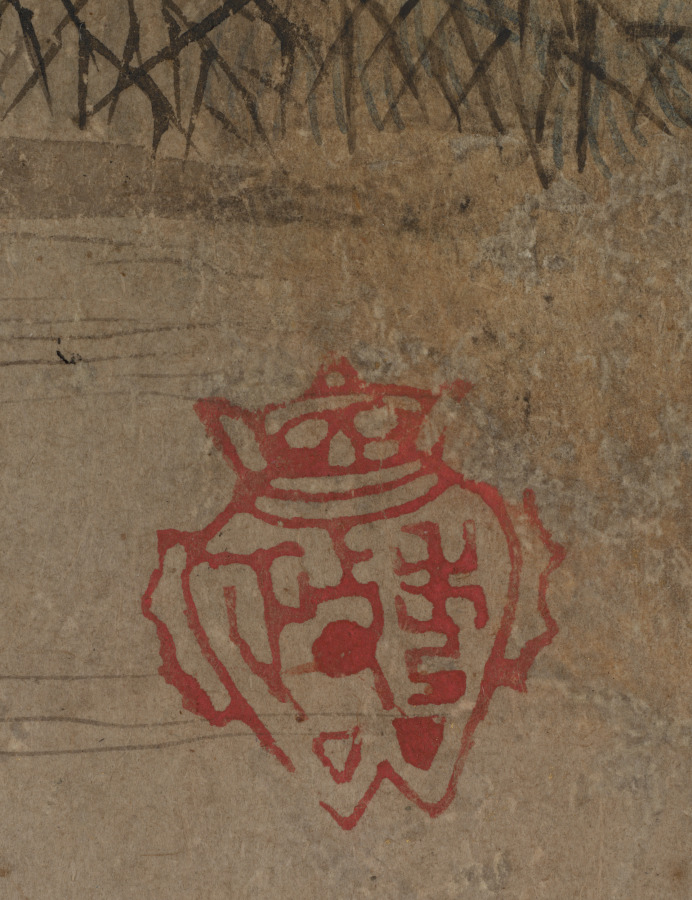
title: Chinese Literatus Traveling to a Mountain Temple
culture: Japan, Muromachi period (1392–1573)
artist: Kano Hidemasa (Japanese, active late 1500s)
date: late 1500s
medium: hanging scroll; ink and light color on paper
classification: Painting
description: This painting bears the seal of Kano Hidemasa, believed to be the son of Kano Hideyori (active mid- to late 1500s) of the important and prolific Kano family of painters. It features a traveler and his servant in a Chinese setting. The two are on their way to a temple up the stairs, climbing the steep slope of the mountain ahead of them. The traveler, who wears clerical garb, has paused to admire and listen to the sound of a nearby waterfall. The painting is a charming interpretation of a scene that might be found in Song dynasty album leaves imported to Japan.